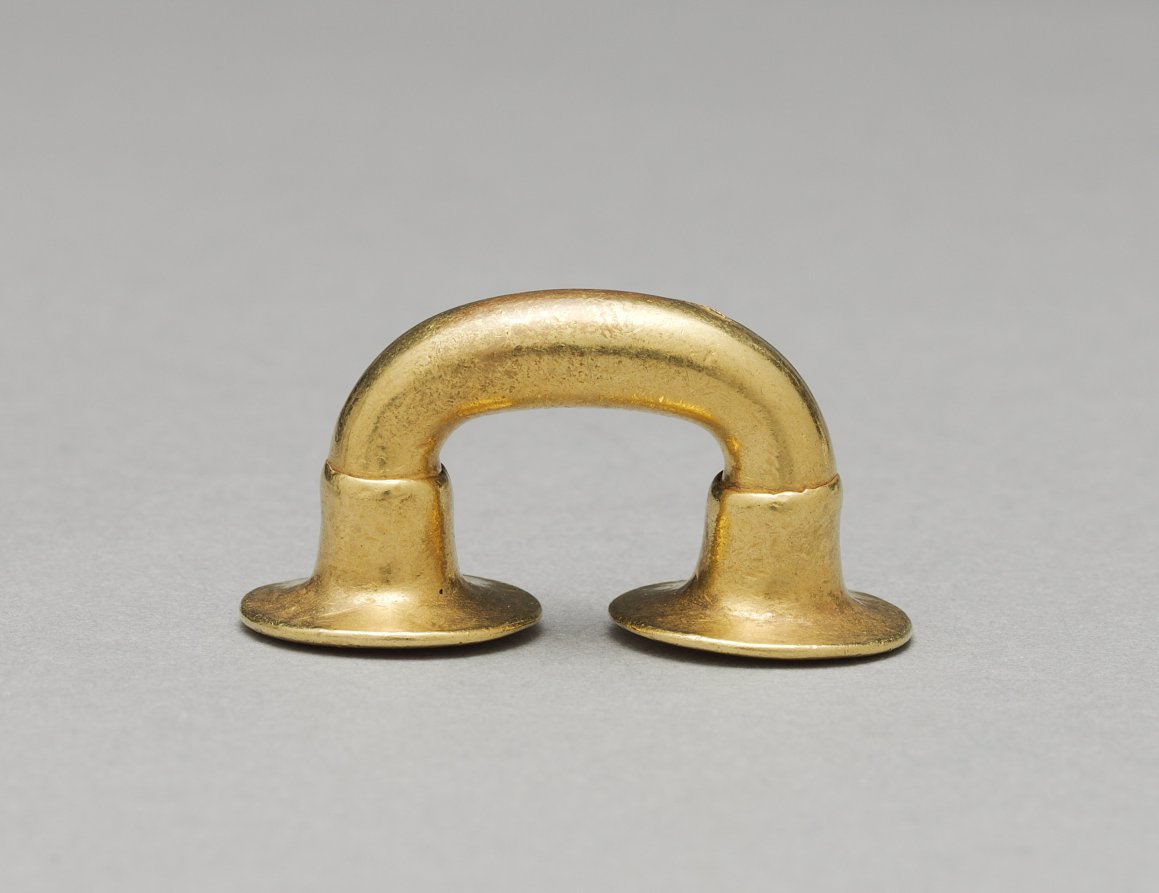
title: Nose Ornament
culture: Colombia, Sinú style, 5th-11th century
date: c. 400–1000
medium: hammered gold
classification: Jewelry